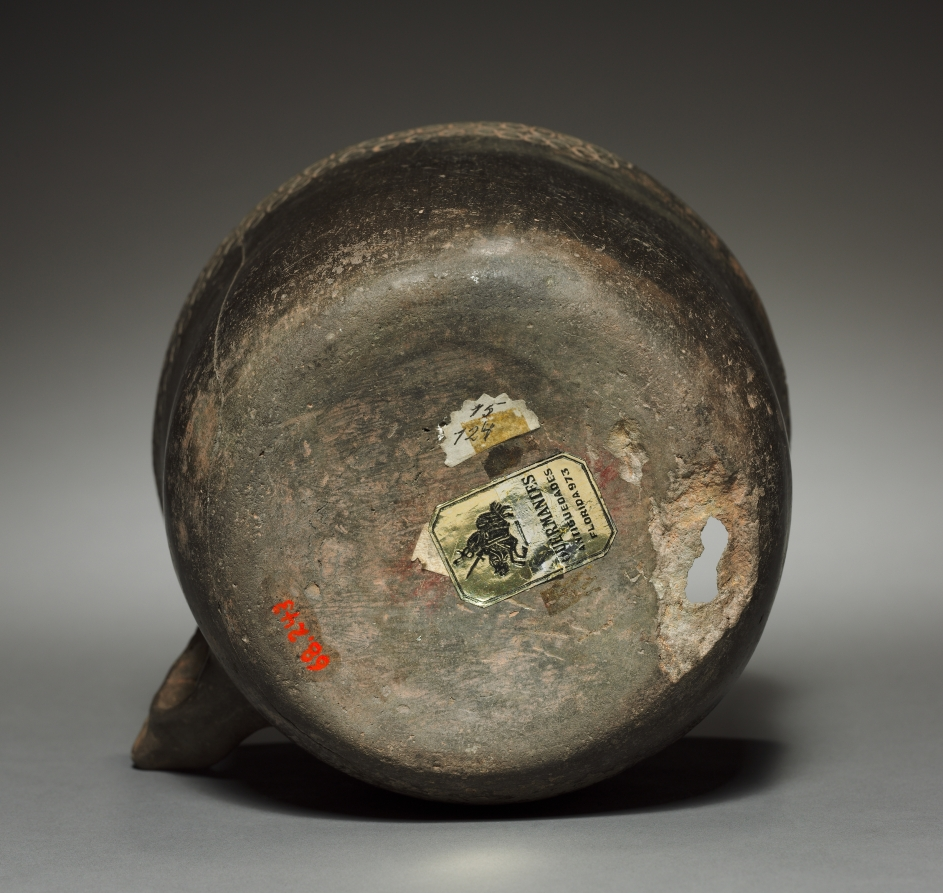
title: Drinking Vessel with Handle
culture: Argentina, Cienga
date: c. 600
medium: earthenware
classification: Ceramic